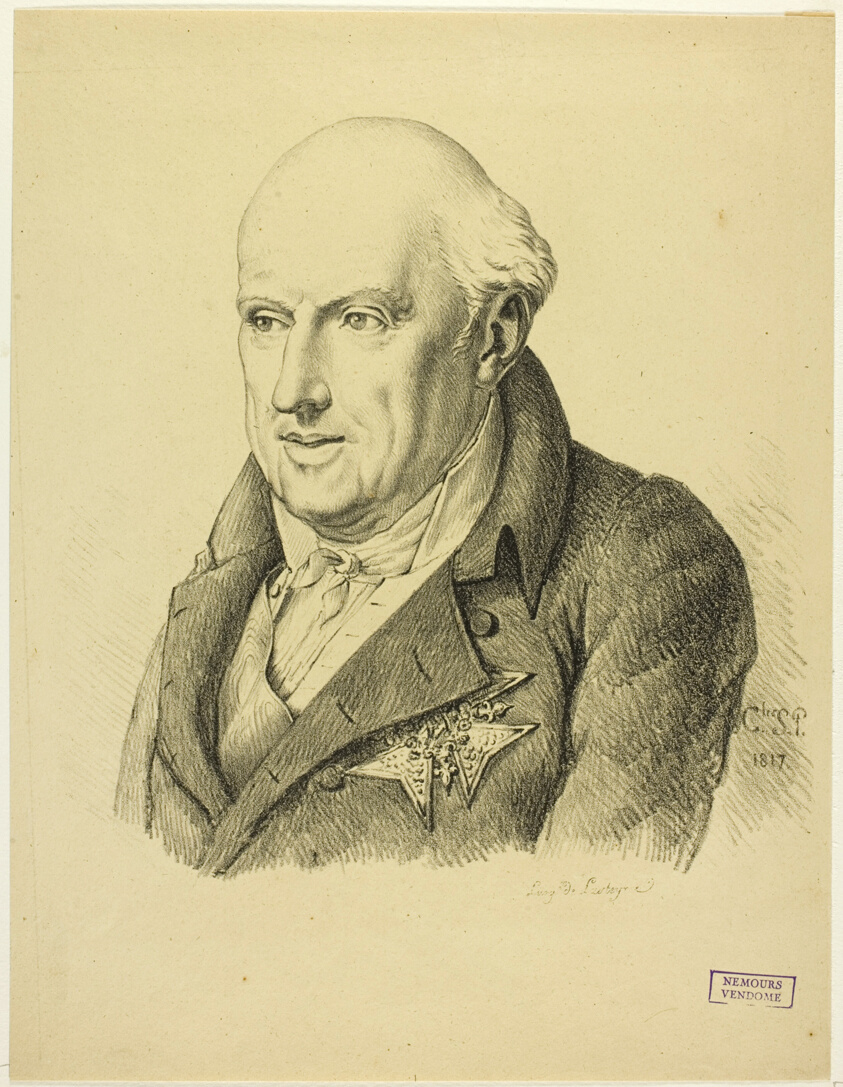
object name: Print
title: Portrait of an Old Man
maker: S. P. Cles (French, 19th century)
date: 1817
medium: Lithograph in black on tan wove paper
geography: France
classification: lithograph; print; prints and drawing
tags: portraits